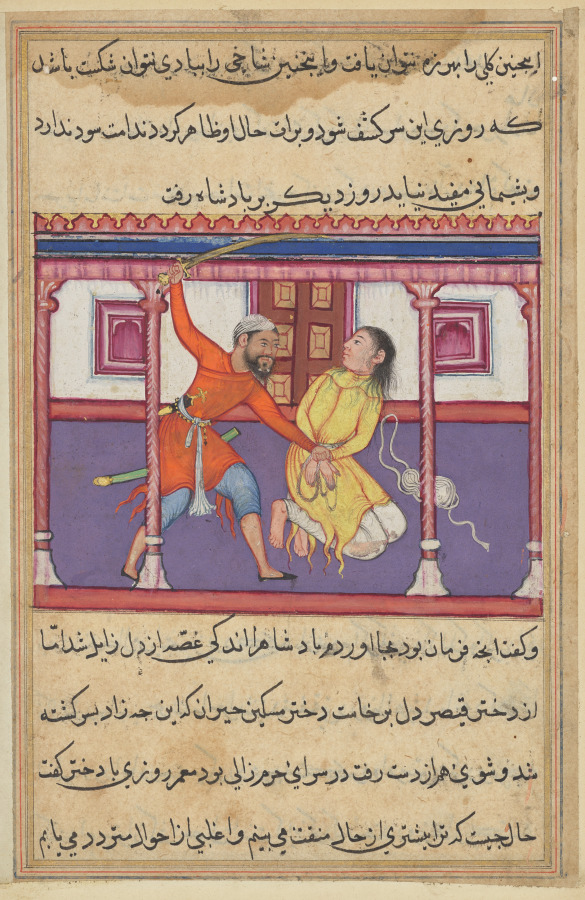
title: The guard spares the life of the slave when he learns that he is the son of the princess of the Rum, from a Tuti-nama (Tales of a Parrot): Fiftieth Night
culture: Mughal India, court of Akbar (reigned 1556–1605)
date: c. 1560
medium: gum tempera, ink, and gold on paper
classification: Painting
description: The king, mistakenly believing that the princess’s secret son is her lover, orders him to be executed. The young man is shown with hands bound and long hair in disarray; his unraveled turban lies on the ground at his side. Just before the guard can behead him, the princess’s son reveals his true identity, and his life is spared.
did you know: The guard hides the princess’s son and does not reveal his identity to the king.